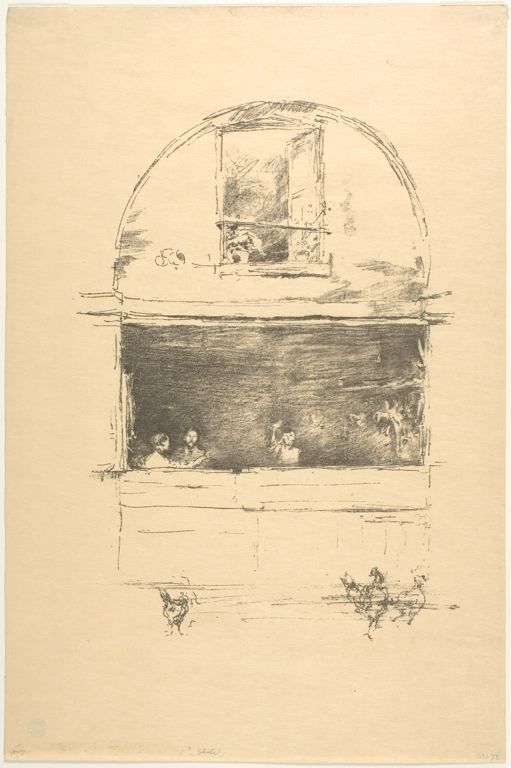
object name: Print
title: The Forge, Passage du Dragon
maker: James McNeill Whistler (American, 1834-1903)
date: 1894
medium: Lithograph on beige Japanese vellum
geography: United States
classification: prints and drawing; print; lithograph